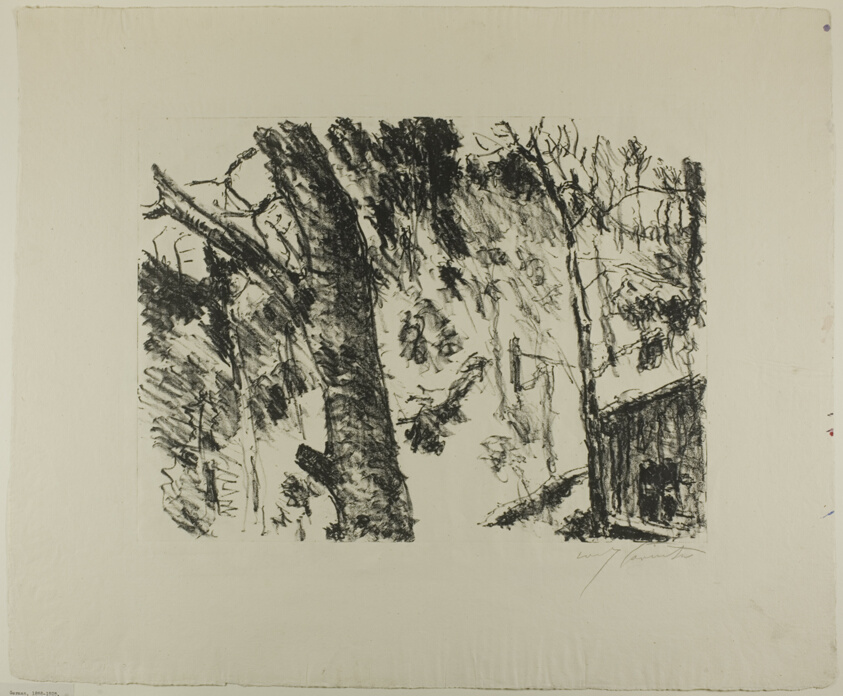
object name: Print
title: Beech Woods, from Early Spring in the Mountains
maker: Lovis Corinth (German, 1858-1925)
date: published 1922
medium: Lithograph on zinc in black, on paper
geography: Germany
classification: lithograph; print; prints and drawing